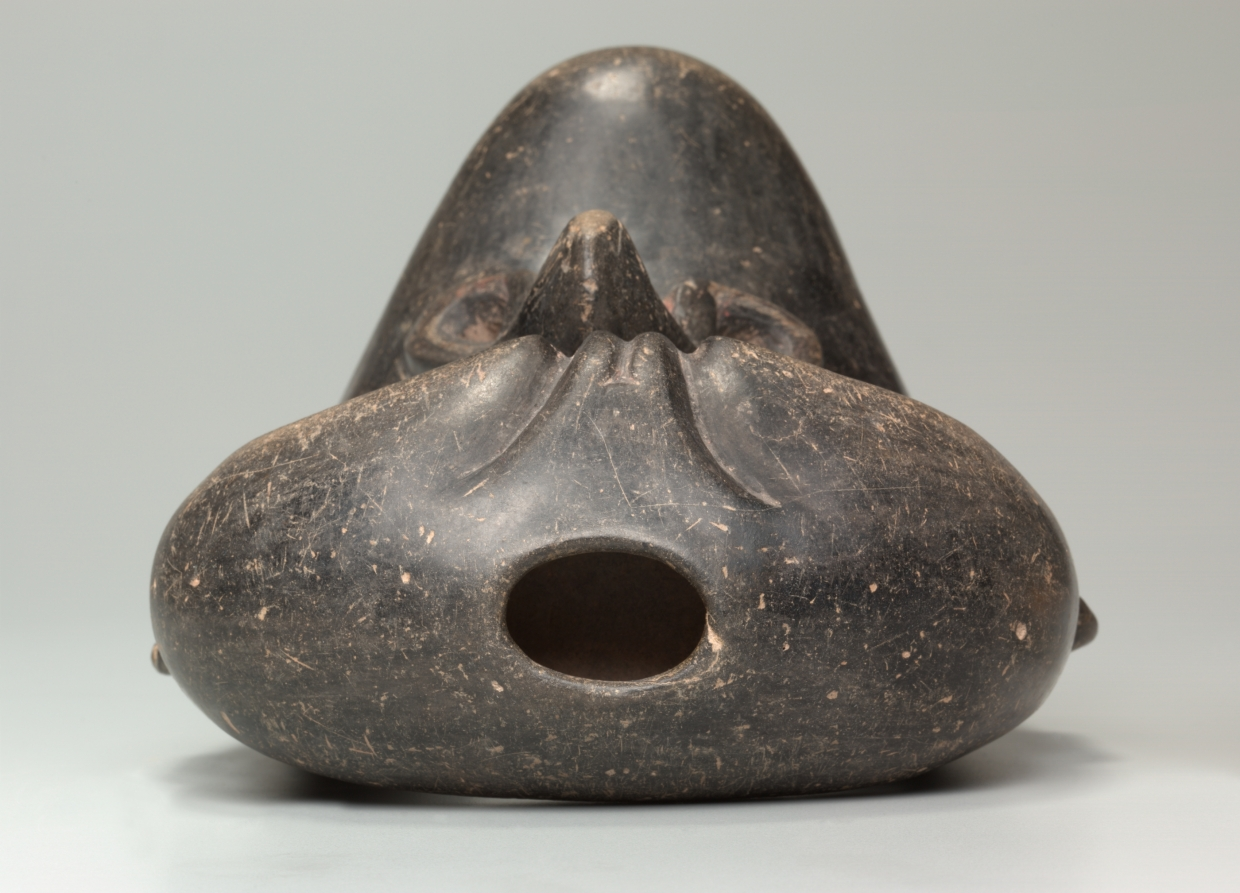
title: Vessel with Deity Mask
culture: Central Mexico (Las Bocas, Puebla?), Olmec, Formative Period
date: 1200–900 BCE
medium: ceramic, traces of pigment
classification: Ceramic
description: This unusual vessel is made of a U-shaped container and a sheet of clay modeled as a deity mask that is startling in its power: pierced eyes glare from the shadow of a muscular brow; the chin juts aggressively; and the part-bird, part-jaguar mouth opens in a shriek. This may be the face of the Olmec rain deity, the inspiration for much Olmec ritual and many accomplished works of art. The vessel may come from a grave or a buried offering.